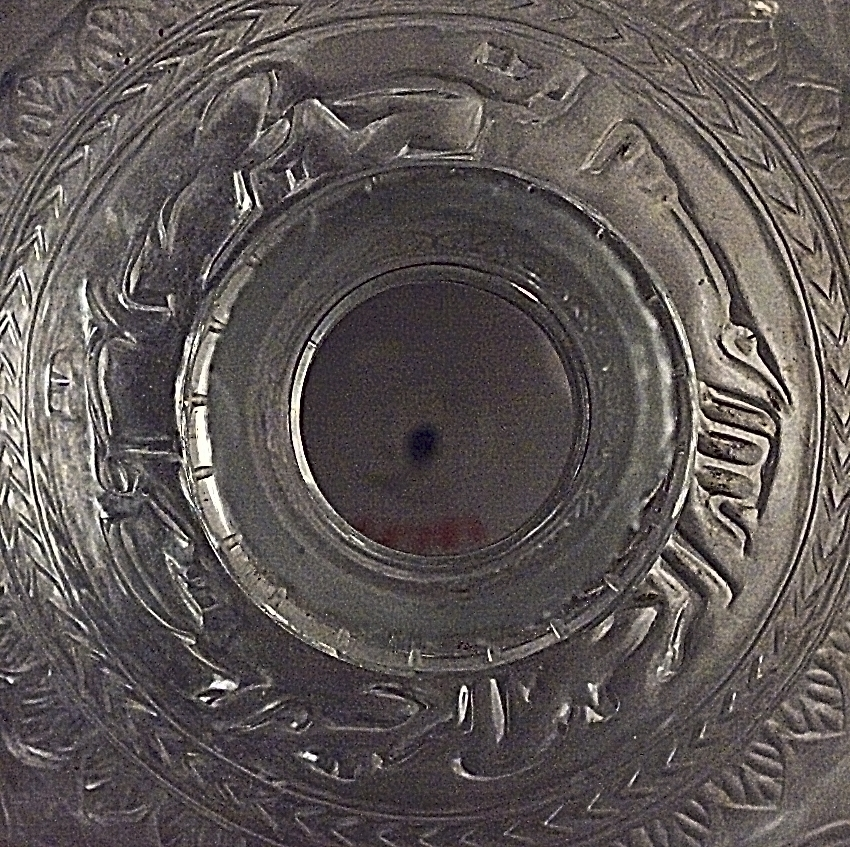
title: Hookah Bowl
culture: India, Mughal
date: 1700s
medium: glass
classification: Glass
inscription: Inscription in Farsi, on body: Even if live charcoal is placed on its head/ The hookah, a teacher of etiquette,/ will not respond unless drawn upon;/ Thus one can learn from its manners of refinement.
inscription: Inscription in Farsi, on shoulder: In the name of Allah the clement and merciful is the key to the wise treasure.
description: The inscription around the body of the base speaks to the use of the hookah in the decadent life of the Mughal court. The hookah is commended for being a proper, refined servant who will not “respond unless drawn upon” or, produce water bubbles when smoke is drawn through the hose. Undoubtedly the witty, poetic allusions would have been appreciated at banquets and other courtly gatherings. The use of wheel-cut glass for this hookah base may have been influenced by English glass and lead crystal that was exported to India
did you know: Around the top of this hookah bowl are incised the opening two lines from the Khamsa (Quintet) of the celebrated Persian poet Nizami (1141–1209).